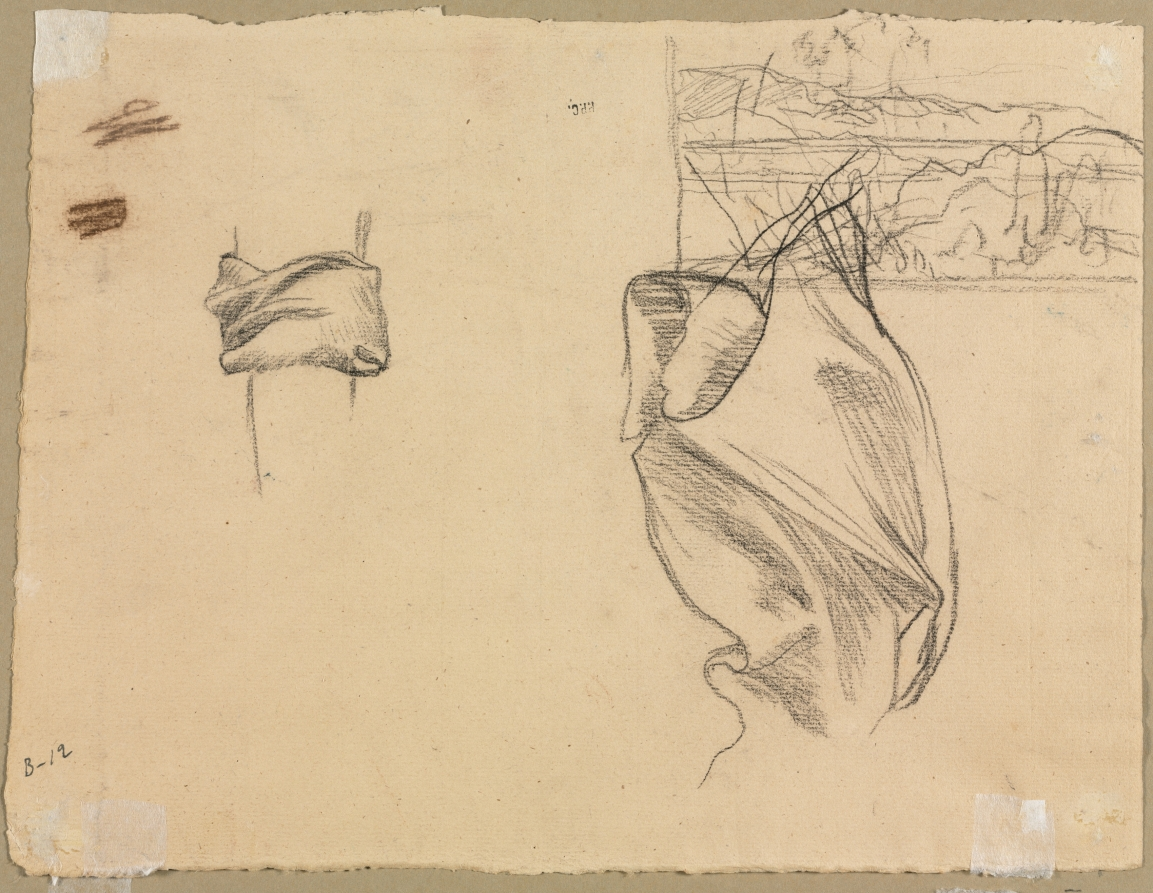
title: Studies of Drapery and Study of a Landscape (verso)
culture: France, 19th century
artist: Pierre Puvis de Chavannes (French, 1824–1898)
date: 1800s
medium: black and brown chalk/pastel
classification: Drawing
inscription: inscribed upper right corner, black ink: B12 [upside down]